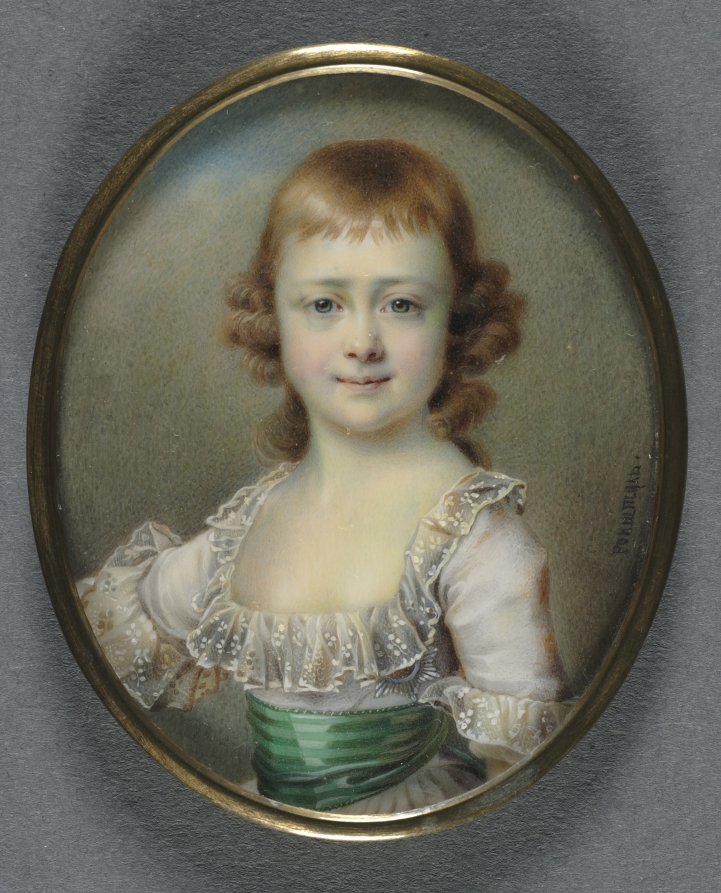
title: Portrait of Grand Duchess Catherine Pavlovna, later Queen of Württemberg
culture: Russia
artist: Alois Gustav Rockstuhl (Russian, 1798–1877)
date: c. 1860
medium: watercolor on ivory on a gilt metal mount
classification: Portrait Miniature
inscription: Signed at right center: Rokstuhl [in Cyrillic]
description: The miniature of Grand Duchess Catherine Pavlovna, later Queen of Württemberg, is among the finest of Alois Gustav Rockstuhl's portraits. It portrays Catherine at around 4 years of age and is one of the few miniatures of children in the museum's collection. This work was painted several decades after Catherine's death and is based on a large-scale, late 18th-century oil painting by Petr Zharkov. A member of Catherine's family likely commissioned the portrait from Rockstuhl as a memento. Zharkov also painted Catherine's three sisters in similar poses, and although Rockstuhl probably reproduced these portraits in miniature as well, the location of each is currently unknown. The star of the Order of Saint Catherine is partially hidden beneath the delicate white ruffled neckline of her dress. The only order available to women in imperial Russia, it established Catherine as a member of the royal family while also referring to her saintly namesake. Catherine grew to be an intelligent and charming woman, deeply loved by her older brother Tsar Alexander I and famous for rejecting the marriage proposal of Napoleon Bonaparte. Catherine married twice, gaining the title Queen of Württemberg through her second marriage to her cousin Prince William of Württemberg. She died tragically of erysipelas complicated by pneumonia in 1819 at the age of 31, leaving behind four children and a reputation as a charitable and kind ruler.